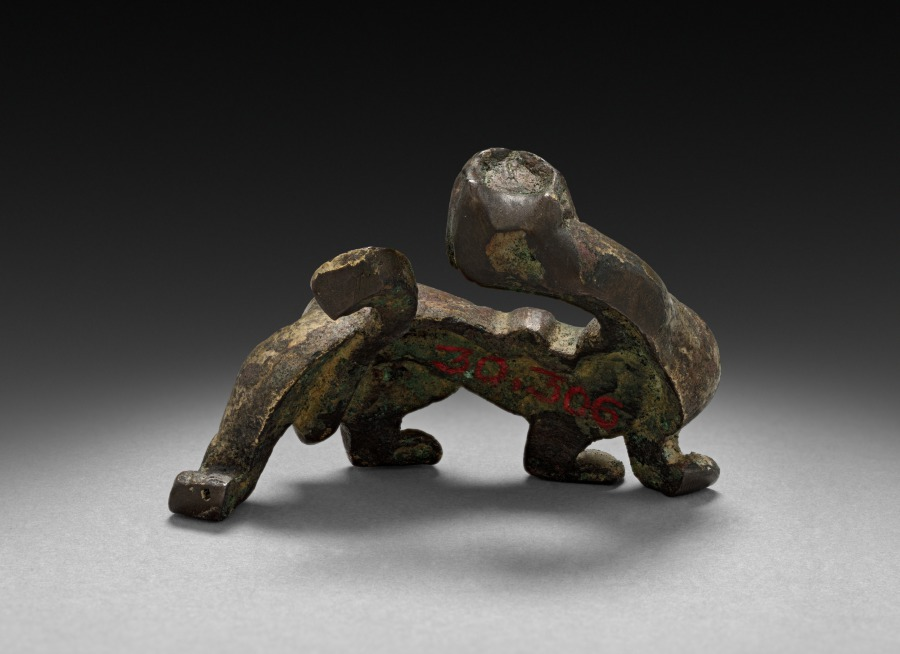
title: Fantastic Lion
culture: China, Han dynasty (202 BCE–220 CE)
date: 206 BCE–220 CE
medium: bronze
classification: Sculpture